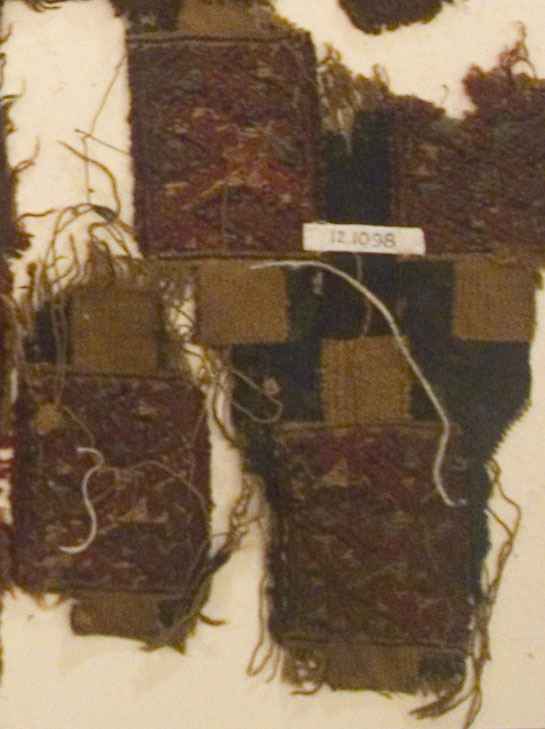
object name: Textile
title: Fragment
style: Chuquibamba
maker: Chuquibamba (Probably south coast, Peru)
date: A.D. 1476/1532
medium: Simple cloth. Brocade interlocking tapestry (old card)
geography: Peru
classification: textile; weaving